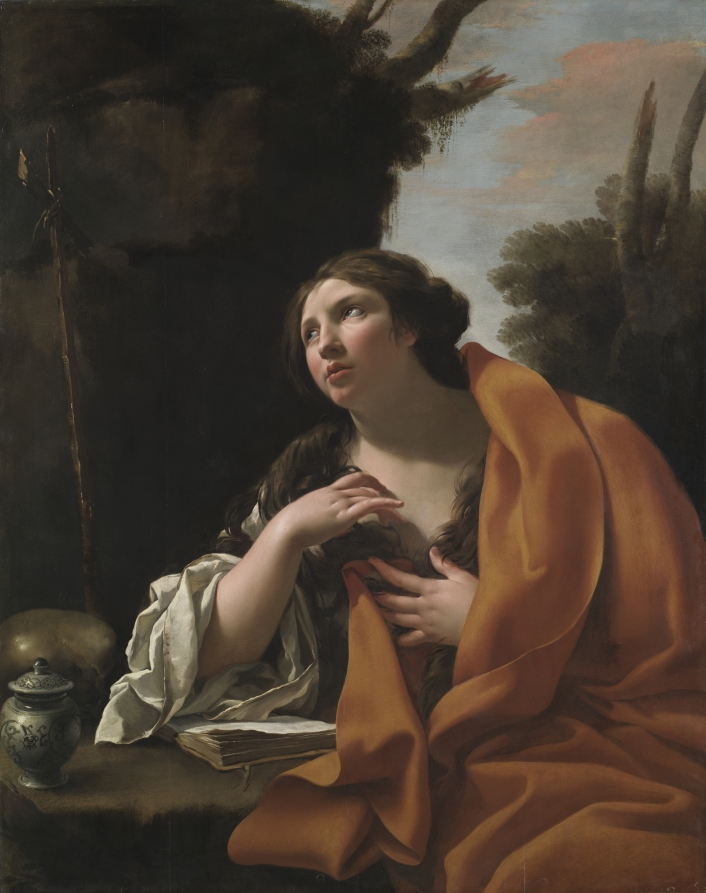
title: Saint Mary Magdalen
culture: France, 17th century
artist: Simon Vouet (French, 1590–1649)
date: c. 1630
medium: oil on panel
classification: Painting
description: Simon Vouet worked in Rome for several years before he was summoned back to France in 1627 to serve as court painter to King Louis XIII. This painting, executed soon after his return, reveals how skillfully Vouet adapted his Italian experiences to local tastes: the focus on a single monumental figure, positioned close to the picture plane, reflects the influence of Caravaggio, but the vivid pastel colors accord with the French preference for a brighter palette. Representations of the penitent Magdalene as a hermit—expressing Christian devotion but also sensuality—were exceedingly popular in the 1600s.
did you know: The skull beside Mary symbolizes the fleeting nature of life and ultimate worthlessness of material possessions.